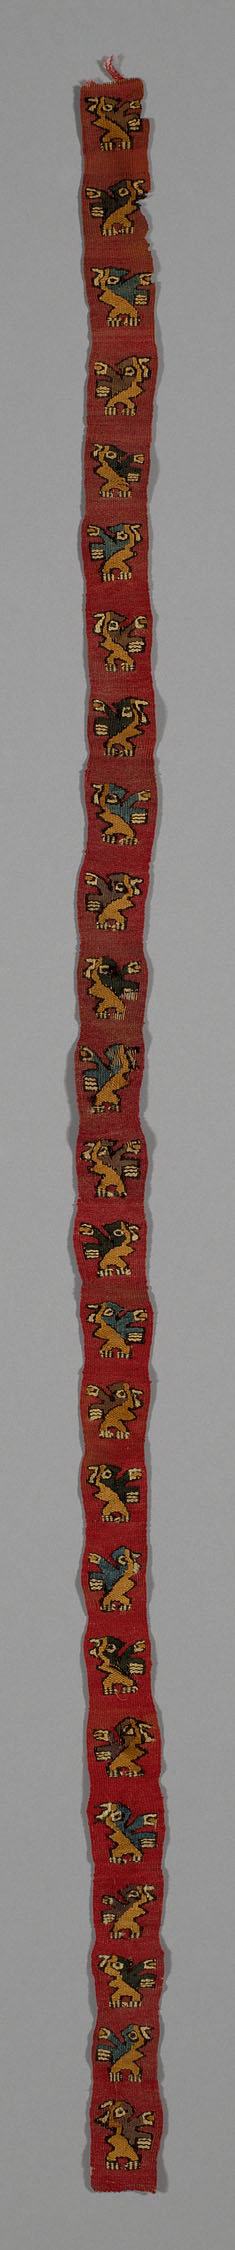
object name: Textile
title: Fragment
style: chancay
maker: Probably Chancay; Probably central coast, Peru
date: A.D. 1000/1476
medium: Slit tapestry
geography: Peru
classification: textile; weaving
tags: birds, animals